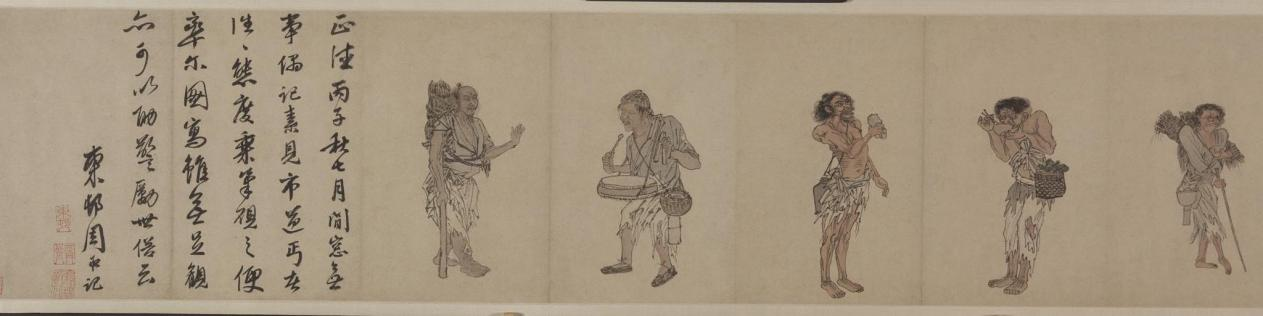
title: Beggars and Street Characters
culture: China, Ming dynasty (1368–1644)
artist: Zhou Chen (Chinese, c. 1450–c. 1536)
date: 1516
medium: Handscroll; ink and light color on paper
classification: Painting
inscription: 題: 周臣流氓圖. 古堇趙鶴琴 [印] 老鶴臨池; 鵝池軒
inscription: 正德丙子秋七月，閒窗無事 ，偶記素見市道丐者種種態度。乘筆硯之便，率爾圖寫。雖無足觀，亦可以助警勵世俗云。 東邨周臣記 [印]東邨; 舜卿; 鵝場散人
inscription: 吳中東邨周君，善丹青，尤長於人物。此圖其所見盛市丐者之狀種種，各盡其態，觀者絕倒。嗟乎，今之晝夜乞哀以求富貴者，安得起周君而貌之耶。臥雲徵君出示，余漫題其後。 甲子歲十月吳門黃姬水 [印] 士雅山人; 另一印不詳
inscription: 是冊凡數種。其飢寒流離疲癃殘疾之狀，種種之異。觀此而不惻然心傷者，非仁人也。計正德丙子逆瑾之流毒已數年。而[江]彬 [錢] 寧輩肆虐方熾。意分符剖竹諸君，亦鮮有能撫字其民者。然則舜卿此作，殆與鄭君 流民圖同意。其有補於治道者不淺，要不可以墨戲忽之也。 長洲張風翼題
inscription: 東村此筆，蓋圖寫飢寒乞丐之態，以警世俗耳。而質山 [黃姬水]欲其寫昏夜乞哀，而靈墟[張鳳翼]則擬之於安上門圖。二君之見，其各有所指哉。昔唐六如每見周筆，輒稱曰：周先生！蓋深服其神妙之不可及。若此冊者，信非他人可能而有符於六如之心伏矣。豈易得耶。若黃、張之指，則又論於畫之外，不在於形似筆墨之旨也。 萬歷丁丑十二月三日 茂苑文嘉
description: Zhou Chen from Suzhou provides rare depictions of impoverished people that once filled the city’s markets and streets. Despite Suzhou’s prosperity, its rapid growth polarized society, including the wealthy and those who had deserted their farmlands, who were without homes, unemployed, or sick. Amid these are figures who inspire fear rather than empathy. The painting may thus be informed by local practices at the end of the lunar year, in which street beggars, in exchange for food or money, would dress up like ghosts and demons to drive out evil forces.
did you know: Although Zhou Chen's original composition was an album of 24 figures, today it is mounted as two handscrolls, one in the Cleveland collection and one in the Honolulu Museum of Art.